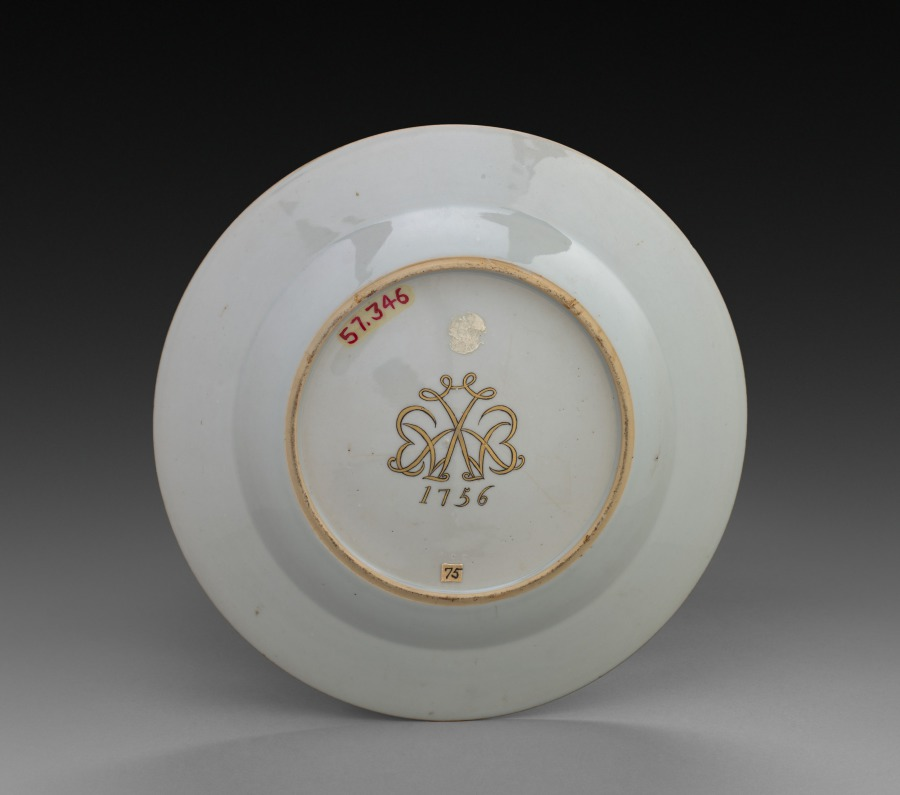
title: Plate: Martin Luther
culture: China, Chinese Export, 18th century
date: 1756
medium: porcelain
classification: Ceramic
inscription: monogram on back and 1756 in gold.